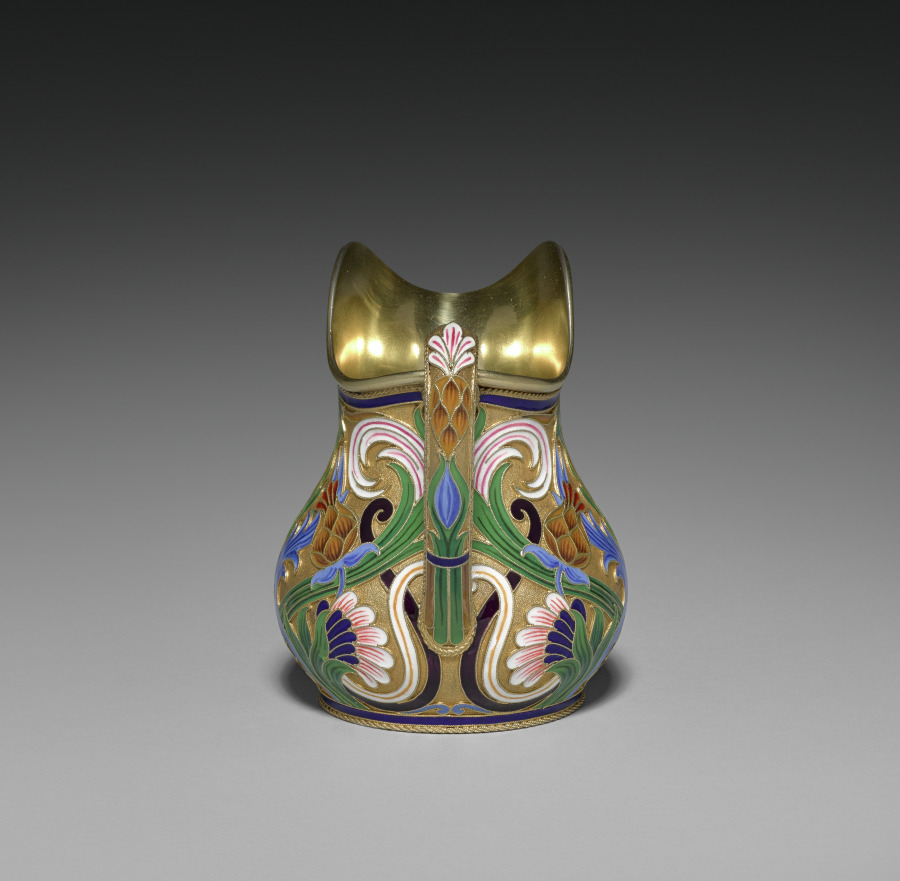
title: Creamer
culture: Russia, St. Petersburg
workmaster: attributed to Feodor Ivanovich Rückert (Russian, 1840–1917)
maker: House of Fabergé (Russian, 1842–1918)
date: 1887–96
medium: silver gilt, opaque cloisonné enamel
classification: Miscellaneous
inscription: 88, St. George [assay mark for Moscow, 1882-1896]; C. Fabergé (in Cyrillic); double-headed eagle [imperial warrant]; 10593 scratched.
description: Fabergé’s craftsmen in Moscow, especially under the watchful eye of workmaster Feodor Rückert, became known for their work in the Pan-Slavic or Neo-Russian style, hearkening back to 17th-century motifs of Russian folk art. Often on rather conventional shapes, Rückert and his silversmiths created an explosion of color, achieved through the historic technique of cloisonné enamel in which tiny metal lines are soldered to the surface then filled with glass powders in various colors and fired to create a high gloss finish. The result is a spectacular evocation of the 17th-century originals. Far from mere copies, however, Rückert's designs, such as this tea service, employ naturalistic or abstract motifs in a thoroughly modern adaptation of a remarkable earlier period of Russian art and decoration.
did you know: This creamer is part of a larger tea service.